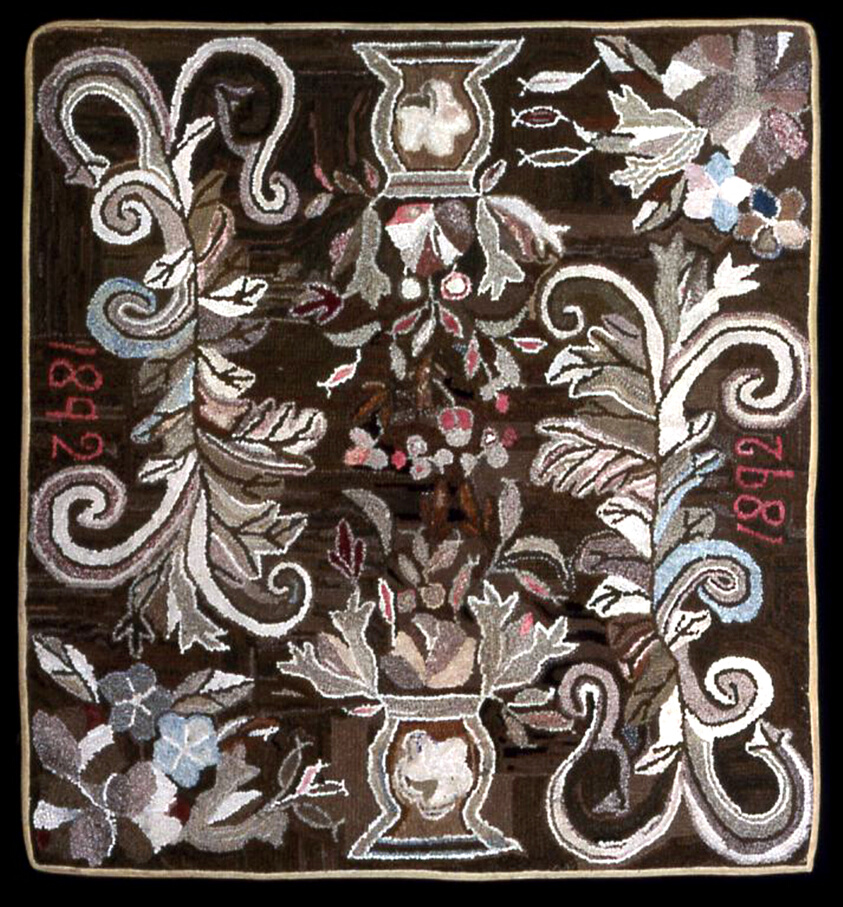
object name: Textile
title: Rug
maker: United States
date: 1892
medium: Variety of fibers, plain weave with variety of fibers, yarns, felted, knitted, oblique interlaced and/or woven strips, forming "hooked" pile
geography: United States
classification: textile; needlework - rug